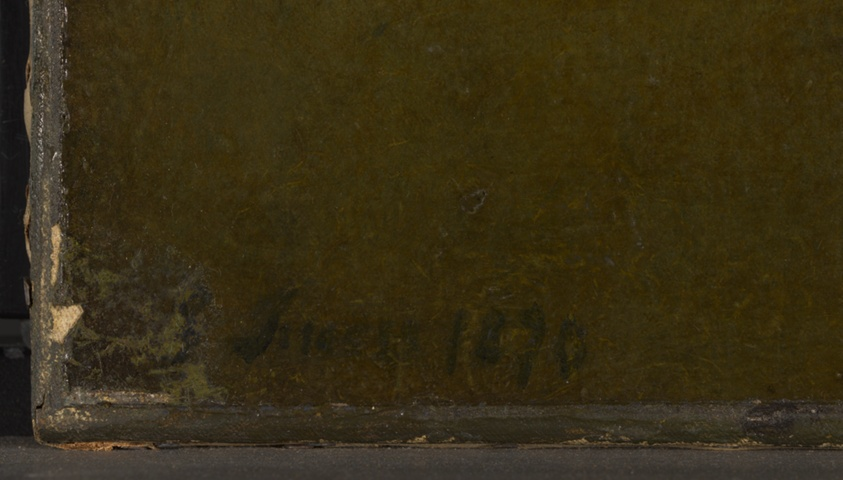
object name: Painting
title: The Moon at Night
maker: George Inness (American, 1825–1894)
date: 1890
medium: Oil on canvas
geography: United States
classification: painting; american arts